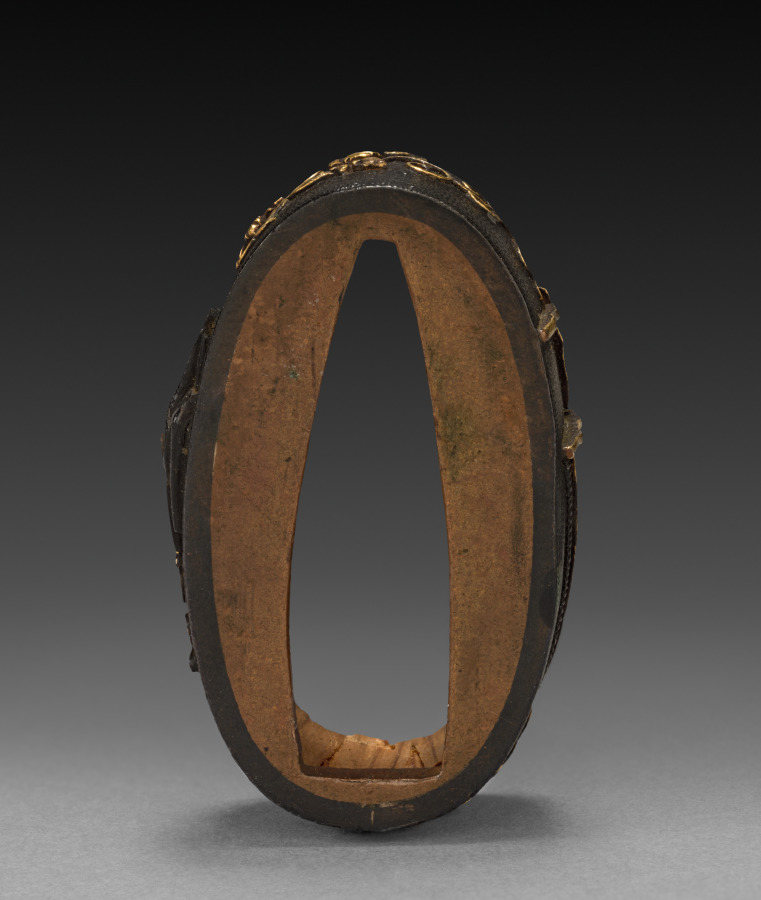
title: Sword-Hilt Collar (Fuchi)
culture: Japan, Edo period (1615–1868)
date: 1700–1850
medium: shakudo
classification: Arms and Armor